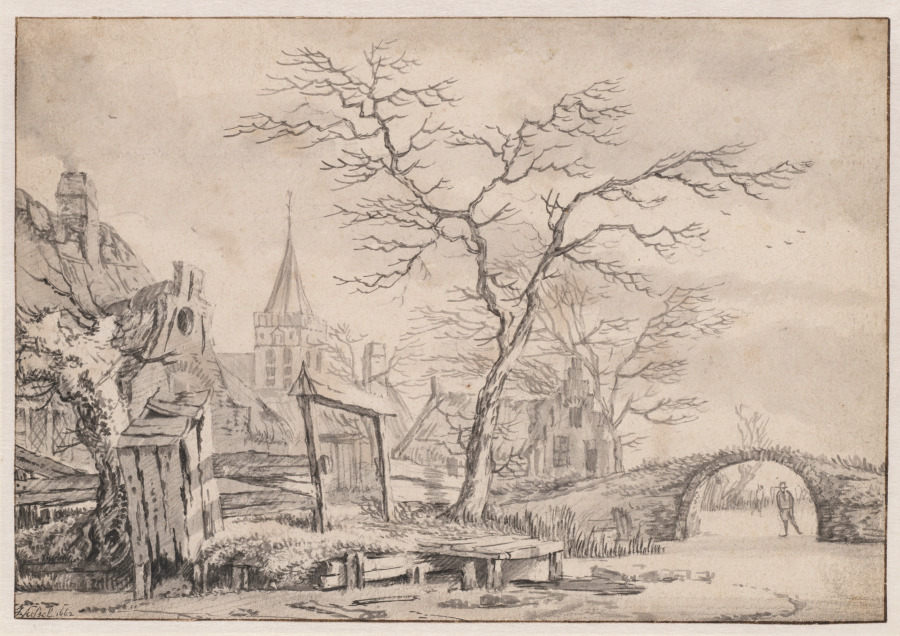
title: Winter Landscape with Skater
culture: Netherlands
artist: Jan van Kessel (Dutch, 1641–1680)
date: 1662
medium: brush and black ink and grey wash over black chalk on cream laid paper; brown ink framing line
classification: Drawing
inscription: recto, signed and date lower left in pen and black ink: JKesssel 1662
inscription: verso, inscribed in graphite, lower right: Jan van Kessel 16(0?)8-1698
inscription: verso, in lower left border (cut off and covered with hinge) [letters} 03 S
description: In this drawing, the Dutch landscape painter Jan van Kessel depicted a rustic rural scene showing rundown sheds beside a frozen canal with a small village church beyond. A skater glides under an overgrown stone bridge. Such rural landscape scenes, considered fundamentally Dutch, became the focus of the Dutch landscape school in the 17th century. Van Kessel was also noted for his trees; the central tree in this image was rendered with black chalk and grey ink wash to create a gently shimmering effect.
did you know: Frozen canals in 17th-century Holland were a mainstay of entertainment for skaters like the one seen in this drawing, providing access from town to town like roads.